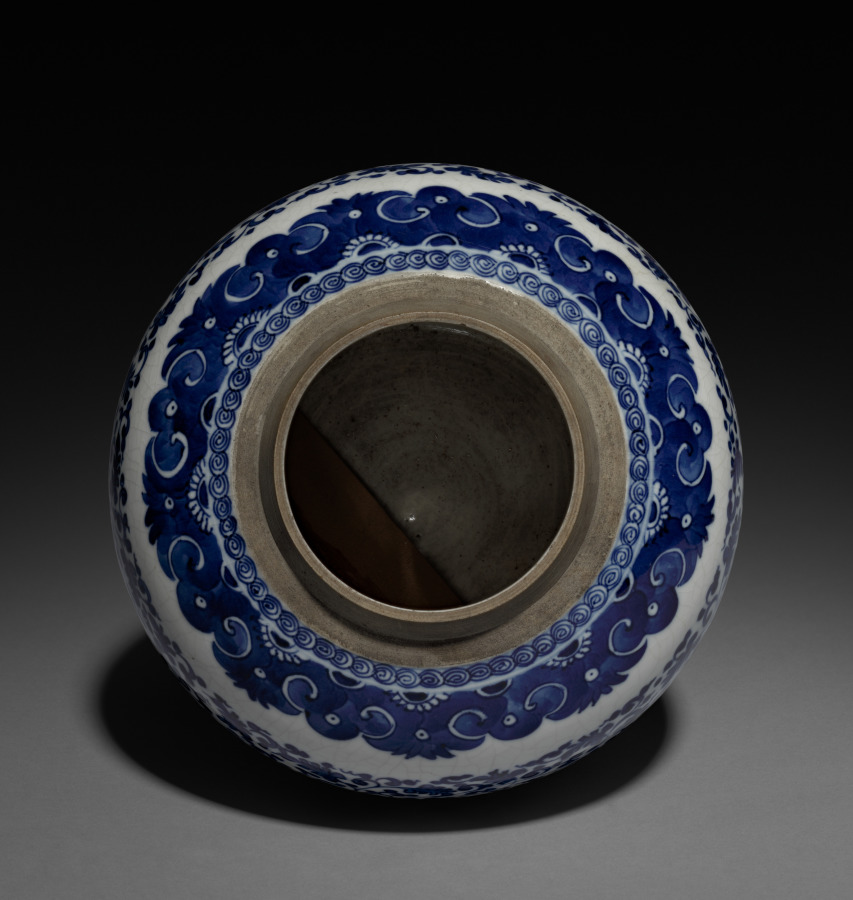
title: Ginger Jar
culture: China, Qing dynasty (1644–1911), Qianlong reign (1736–95)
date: 1736–95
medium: porcelain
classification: Ceramic